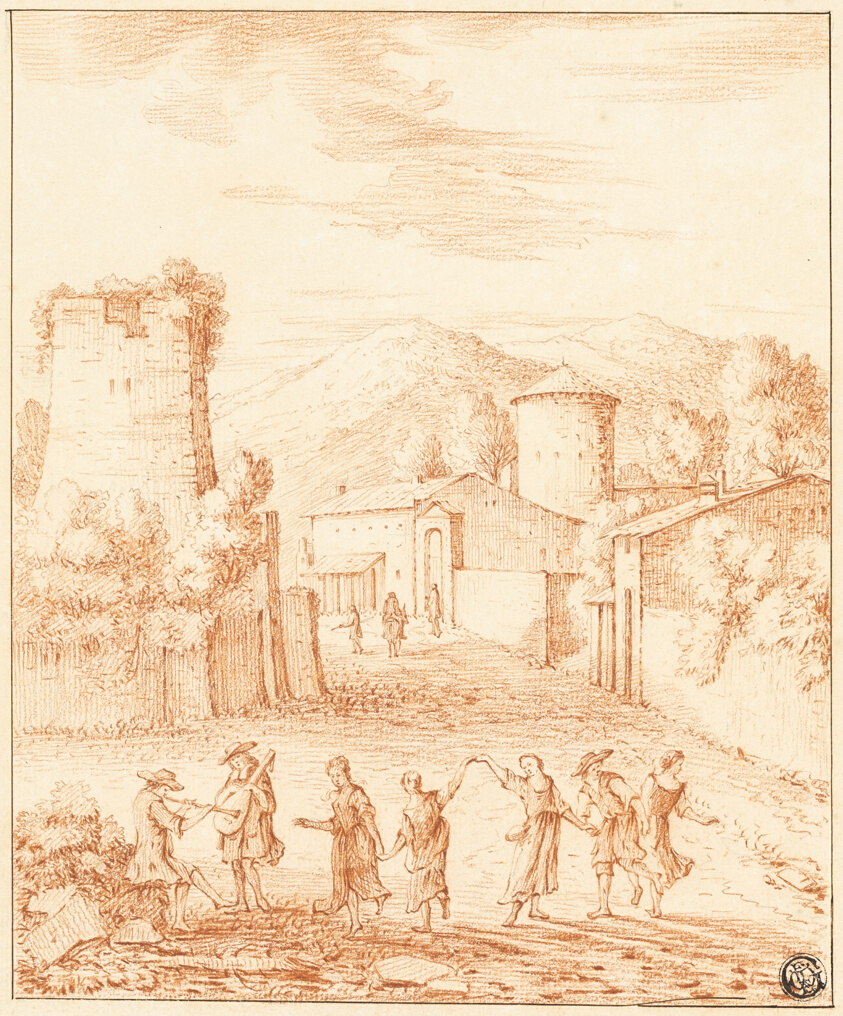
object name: Drawing and Watercolor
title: Dancers and Musicians Before Village with Ruined Tower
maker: Claude Lorrain (French, 1600-1682)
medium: Red chalk over traces of graphite with pen and brown ink border, on cream laid paper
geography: France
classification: chalk; drawings (visual works); prints and drawing